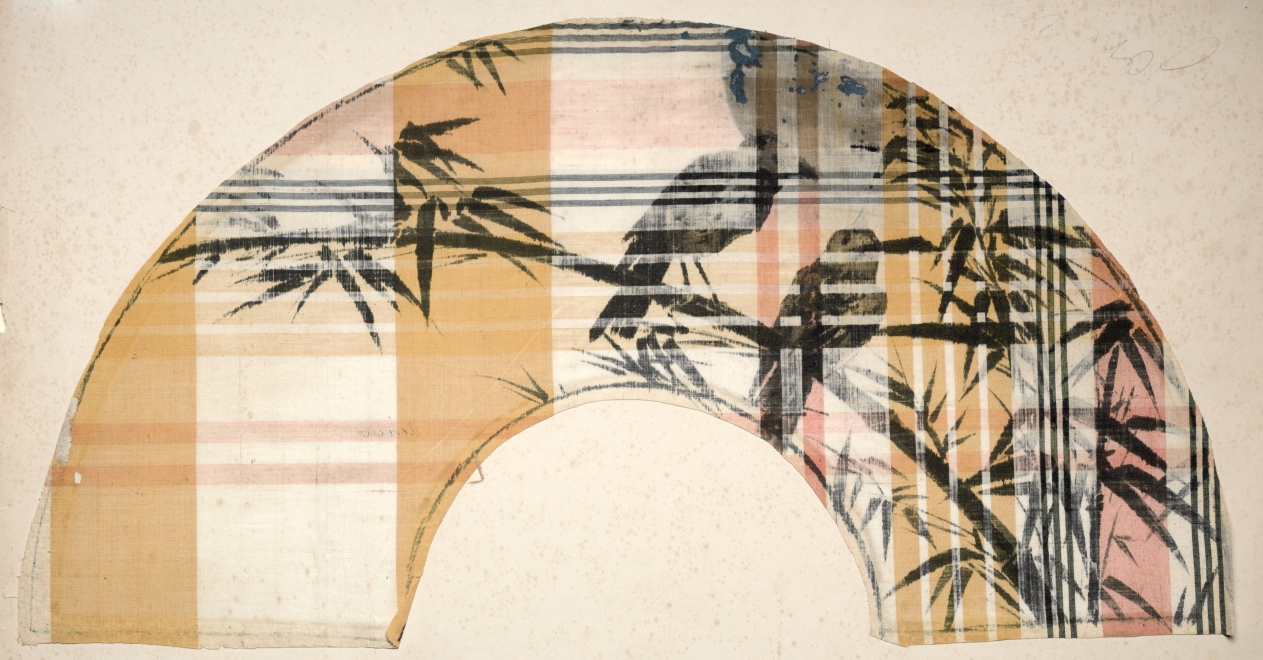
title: Fan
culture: France, 19th century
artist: Henri Charles Guérard (French, 1846–1897)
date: c. 1890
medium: black ink, watercolor, and tinted metal leaf on patterned fabric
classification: Drawing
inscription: signed in ink